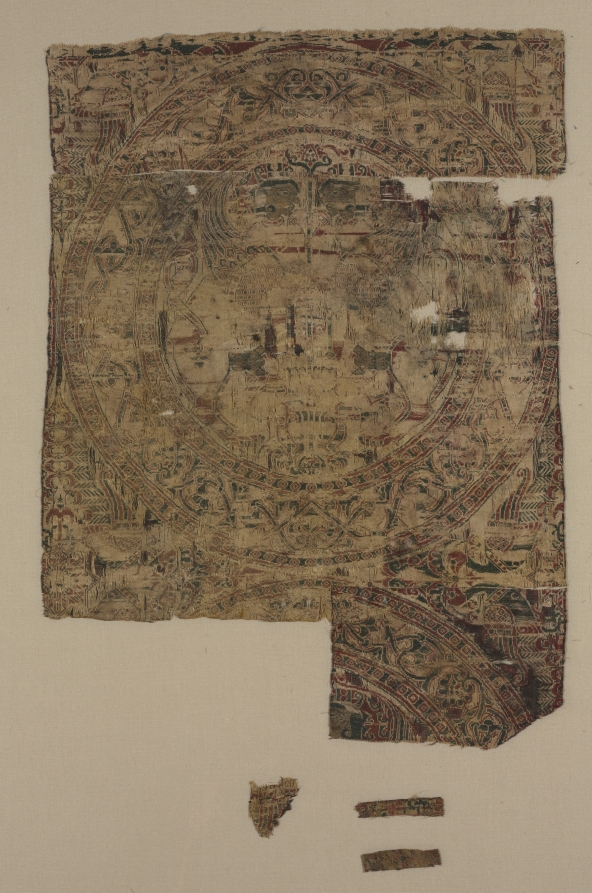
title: Fragment with confronted sphinxes in roundels from the tomb of Saint Bernard Calvo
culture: Spain, Almeria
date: 1200–43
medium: Silk and gold thread: lampas, taqueté, and plain-weave variant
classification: Textile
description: Composite creatures, such as winged lions and sphinxes, predate the rise of Islam in the Arabian Peninsula. Islamic textiles continued to include them for centuries after the Arab conquest of Spain. Pairs of lions with gold faces rear up to bite the haunches of the winged beasts. In between the roundels are pairs of peacocks, motifs traceable to pre-Islamic Persian art that spread throughout the Islamic world, including Spain. The body of Saint Bernard Calvo, the Catholic Bishop of Vich in 1233–43, was wrapped in textiles, including these fragments that still retain traces of his blood.